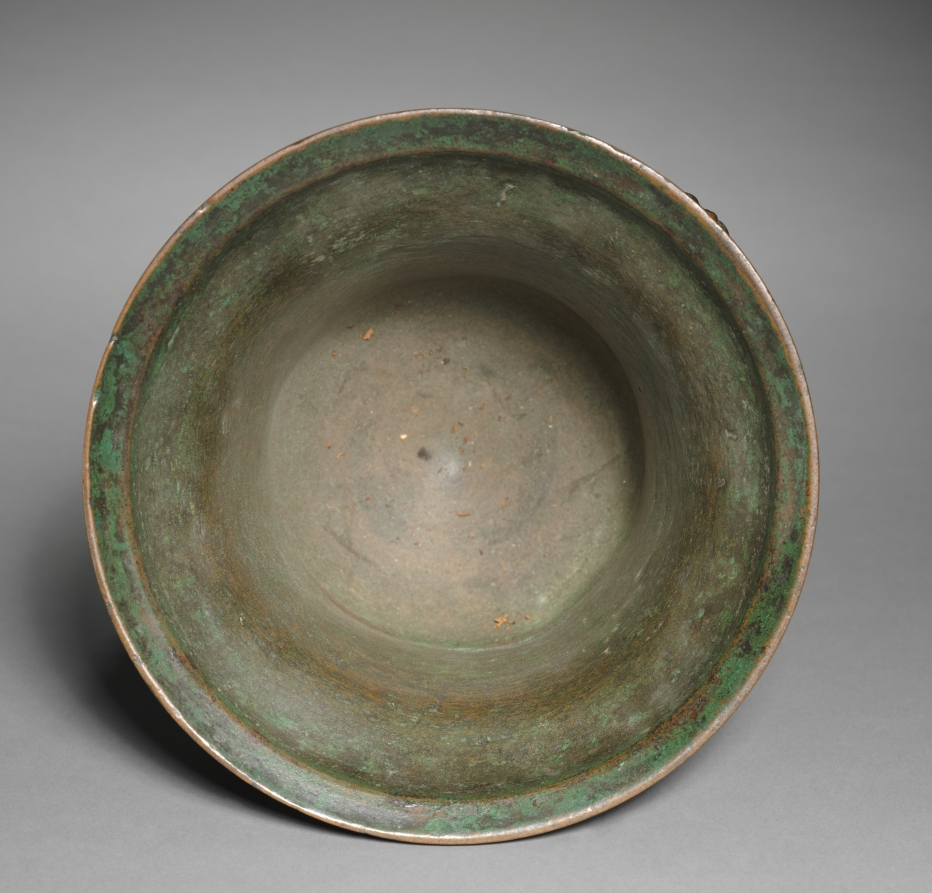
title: Mortar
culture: Italy, 18th century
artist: Georgius Mazzochus (Italian)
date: 1712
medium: bronze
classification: Sculpture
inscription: Inscription on obverse: "ANNO M D C C XII / GEORGIUS MAZZOCHUS / (fleur-de-lis)" Insciption on reverse: "FRANC I . PLAC ET PAR DUX VII / FECIT / (crowned shield with 6 fleur-de-lis)"